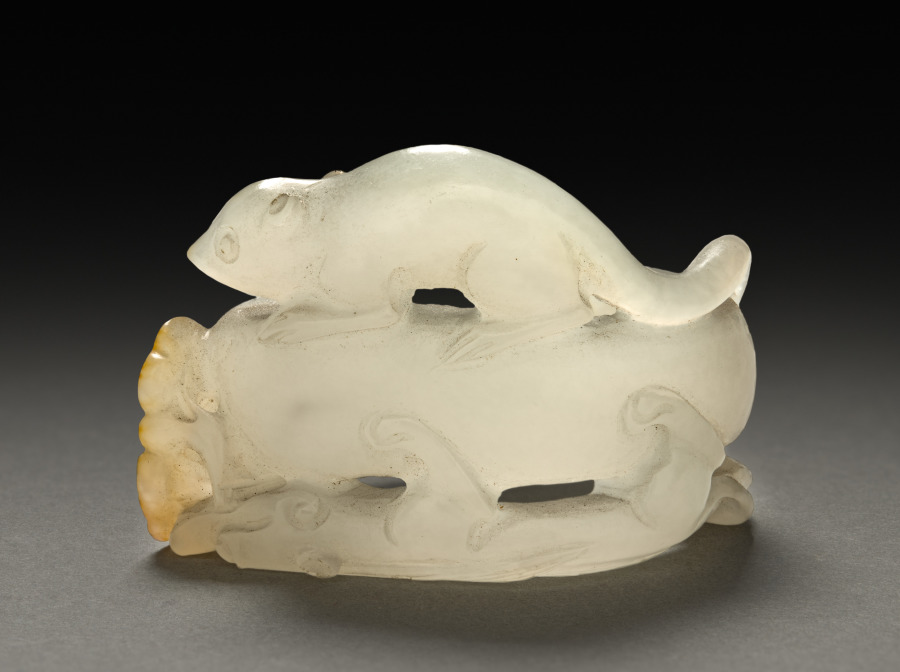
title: Thumb Ring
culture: China, Qing dynasty (1644-1911)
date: 1600s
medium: jade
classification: Jade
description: This white jade thumb ring was carved into the form of a dragon and a mouse in relief.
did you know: When polishing and shaping the white jade, the carver deliberately left the yellowish "skin" of the original rock on one section of the ring.